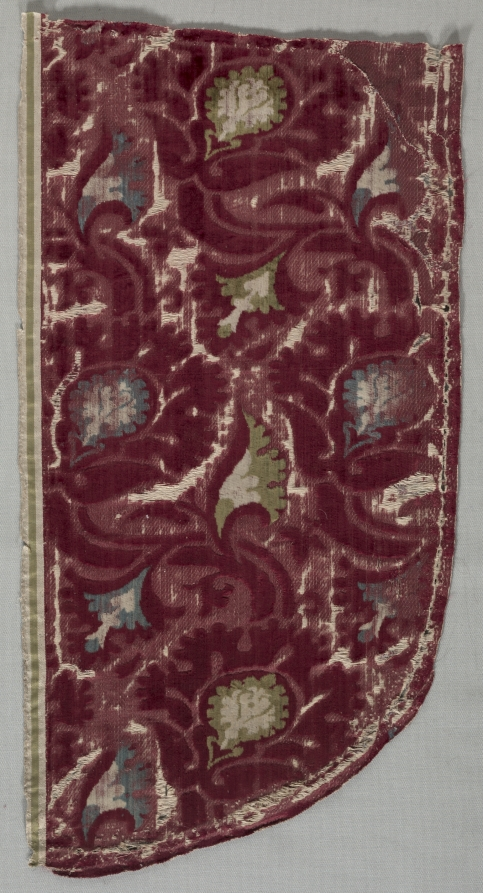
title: Velvet Fragment (of a Chasuble ?)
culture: Italy, early 15th century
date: 1400–1420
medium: velvet (cut and voided); silk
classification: Velvet